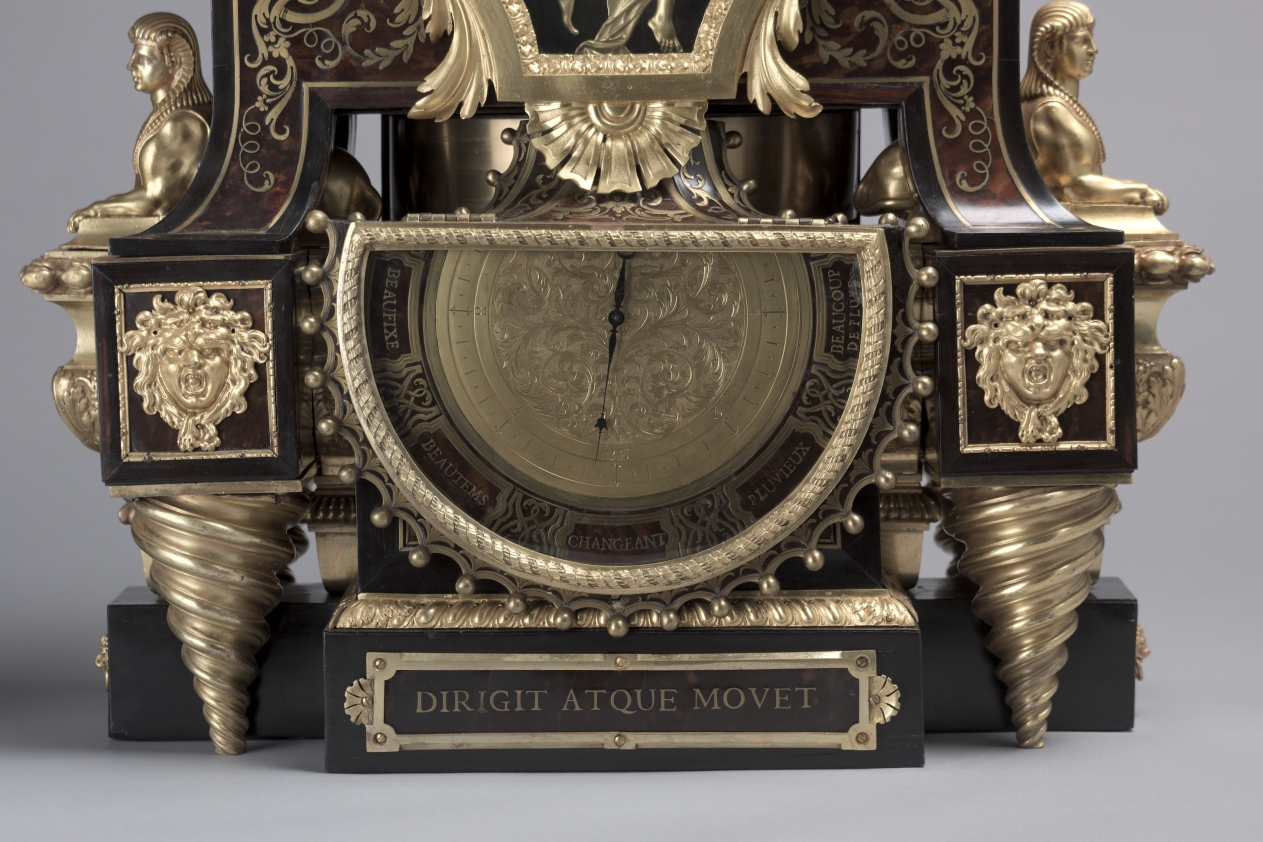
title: Clock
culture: France, late 17th Century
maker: André-Charles Boulle (French, 1642–1732)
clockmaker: Balthazar Martinot II (French, 1636–1714)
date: c. 1695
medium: tortoise shell and brass inlay, gilt bronze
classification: Furniture and woodwork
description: Appointed cabinetmaker to King Louis XIV in 1672, André-Charles Boulle became a master of furniture making in France during the late 1600s until his death in 1732. Known primarily for his use of marquetry, in which metal patterns are inlaid into tortoiseshell then applied within the veneered surface of the furniture, Boulle established a level of quality and craftsmanship few others could achieve. As a result, his work found favor at the royal court and among other aristocrats and diplomats eager to impress the king. Often exhibiting stout architectural proportions with elegant groups of inlaid motifs, Boulle’s designs are an example of the intellectual fashion for contrasting ideas, materials, and motifs. With its relatively new scientific invention of a pendulum mechanism and the addition of a barometer, the mantel clock represented the wealth, prestige, and intellect of its owner.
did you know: The Latin phrase inscribed on this clock, Dirigit atque movet, can be translated as "time constantly moves on."